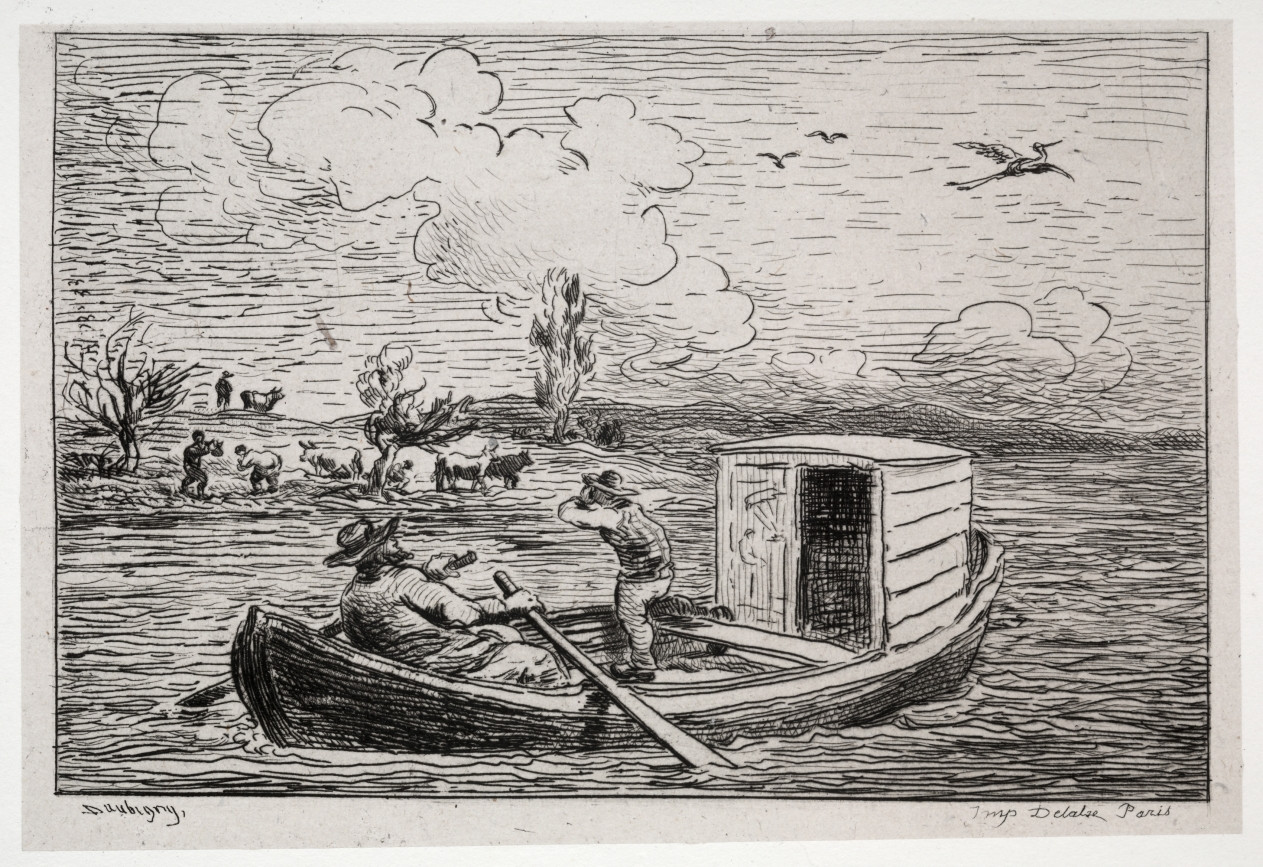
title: The Boat Trip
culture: France, 19th century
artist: Charles François Daubigny (French, 1817–1878)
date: 1861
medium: 16 etchings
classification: Portfolio